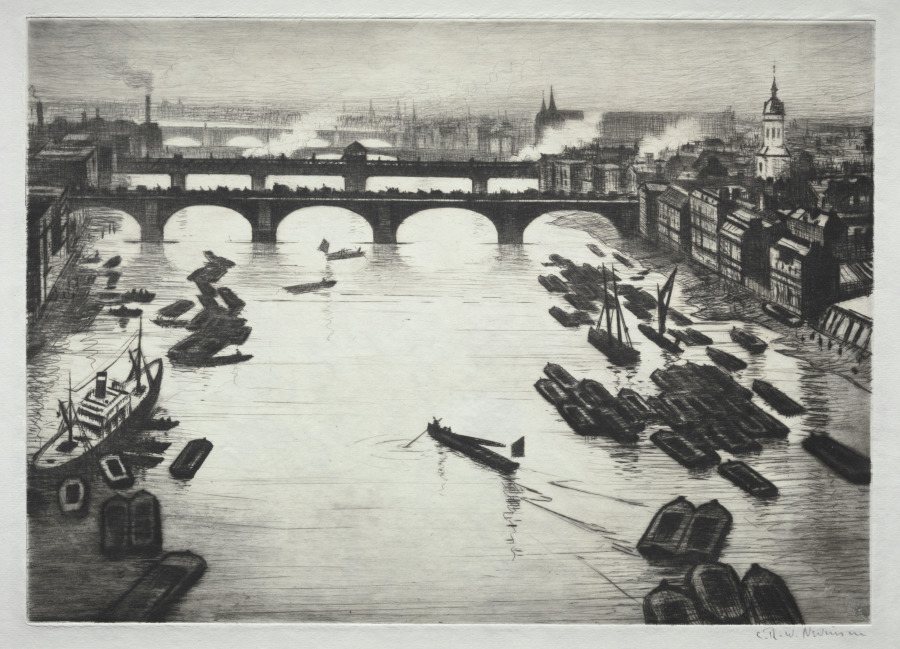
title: London Bridges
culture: England, 20th century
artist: Christopher Nevinson (British, 1889–1946)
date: 1924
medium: drypoint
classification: Print